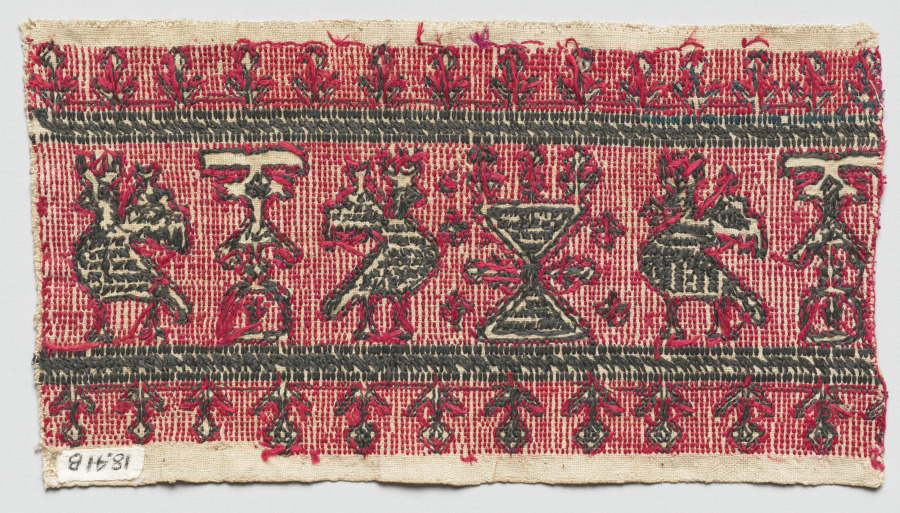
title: Fragment of a furnishing textile (one of five)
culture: Africa, North Africa, Morocco, Azemmour, Moroccan embroiderer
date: 1700s–1800s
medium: Linen, silk, dye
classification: Embroidery